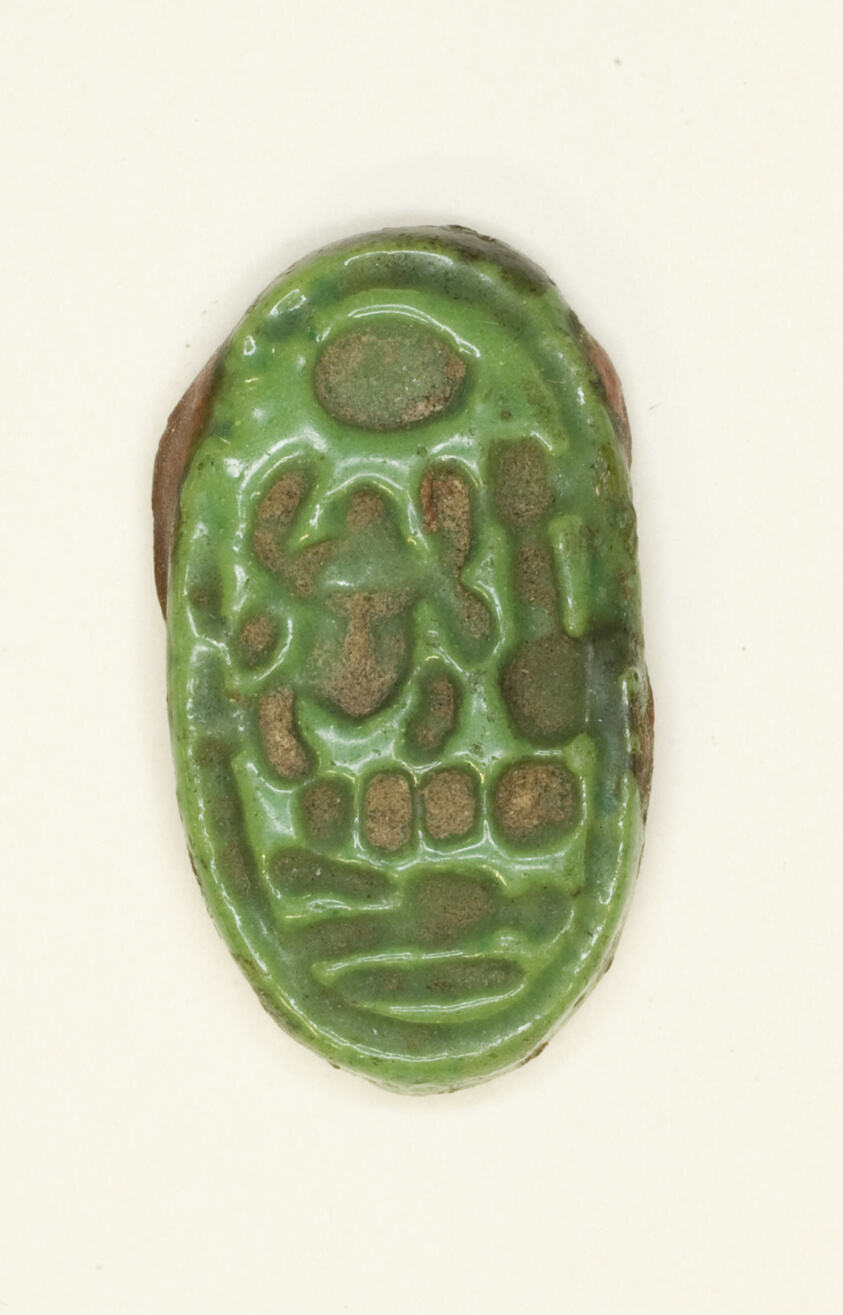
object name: Costume and Accessories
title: Ring: Neferkheprure-Waenre (Akhenaton)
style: eighteenth dynasty, new kingdom, egyptian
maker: Egyptian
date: New Kingdom, Dynasty 18, reign of Akhenaten (about 1352–1336 BCE)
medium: Faience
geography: Egypt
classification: ceramics; jewelry; ancient art; costume; faïence (composite material)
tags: pharaohs